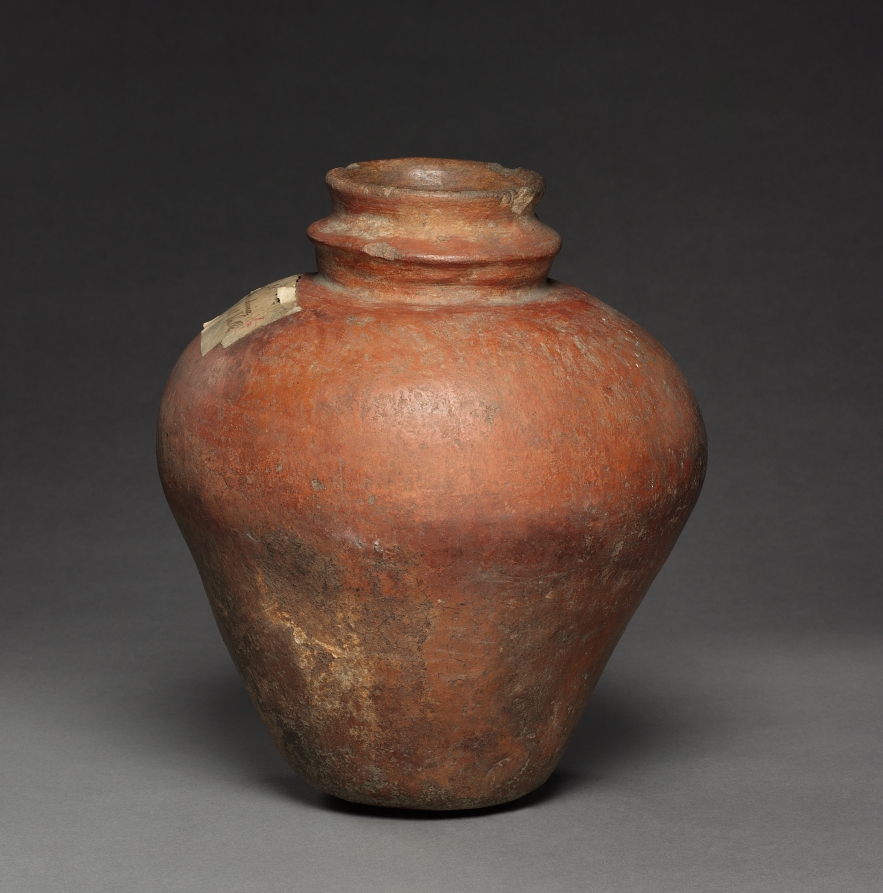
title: Vase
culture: Colombia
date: before 1921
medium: pottery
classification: Ceramic